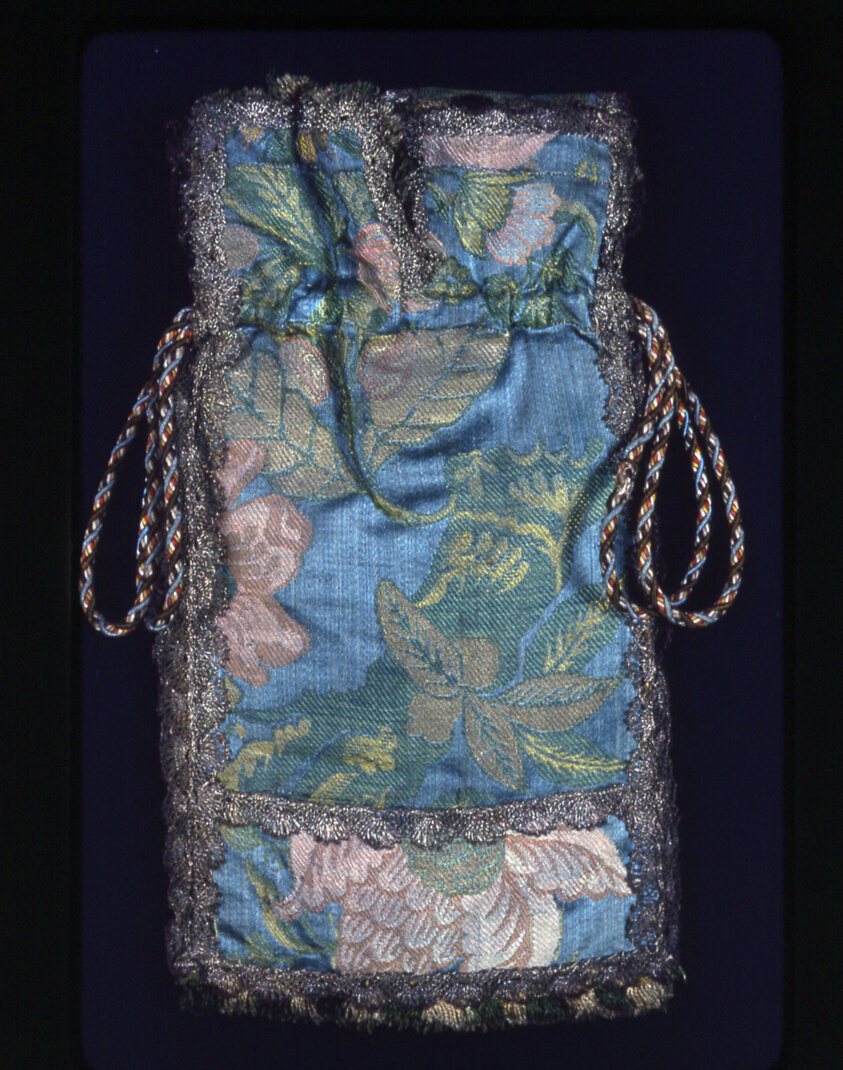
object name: Textile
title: Double Bag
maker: France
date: 1701/25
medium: Silk, warp float-faced satin weave; with supplementary patterning and brocading wefts tied by main warp in twill weave; under side: silk, satin damask weave; blue lining: silk, satin damask weave; red lining: silk, warp-faced weft rib plain weave with ground weft fringe; braid and drawstring of silk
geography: France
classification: textile; costume accessory - bag